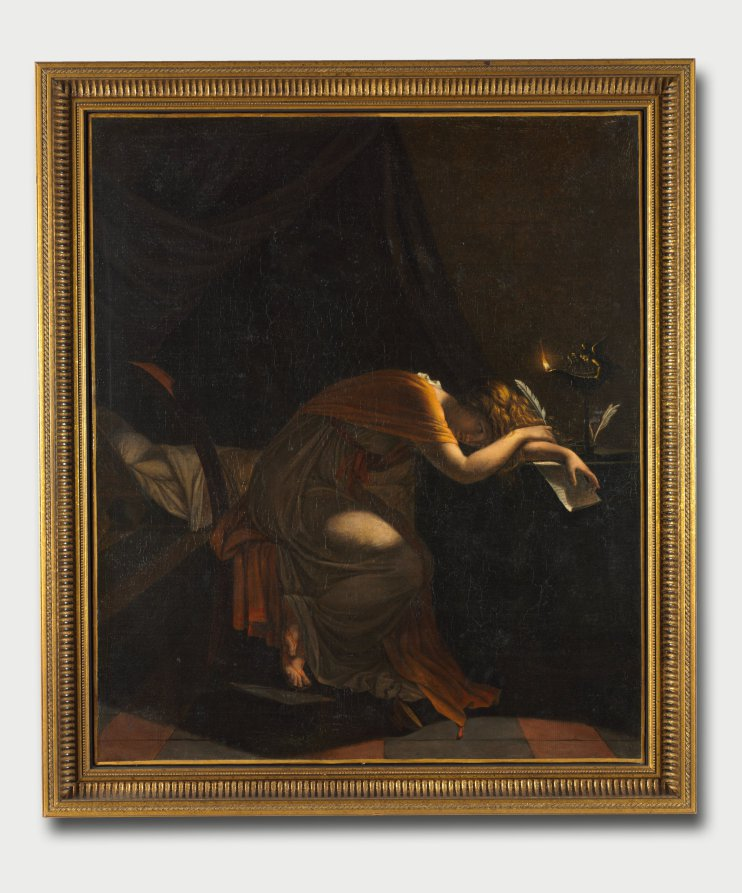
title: The Death of Sophonisba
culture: France, 19th century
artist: attributed to Pierre Guérin (French, 1774–1833)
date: c. 1810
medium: oil on canvas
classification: Painting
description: When a Roman general seized Sophonisba as war booty, her husband encouraged her to die with dignity rather than become a captive. She chose suicide by poison. As depicted in the painting, the toxin has just begun to take effect, and she uneasily maintains composure while penning a suicide note.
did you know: The story of Sophonisba has been an inspiration to artists, writers, and even filmmakers since the 1300s.